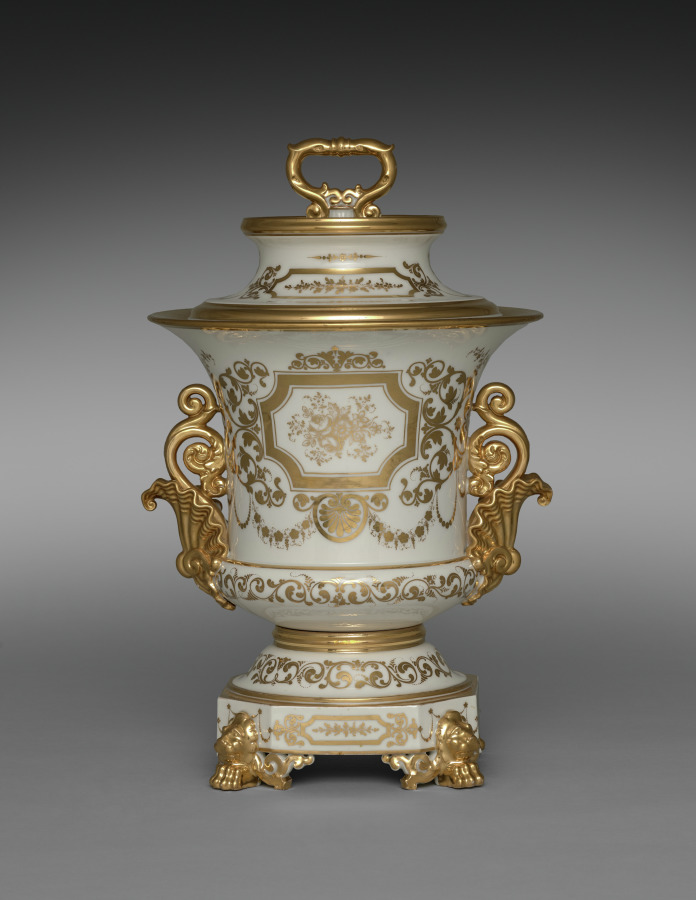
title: Covered Ice Cream Pail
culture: France, Paris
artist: Factory of Jacob-Petit (French, 1830–1865)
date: c. 1840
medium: gilt porcelain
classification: Ceramic